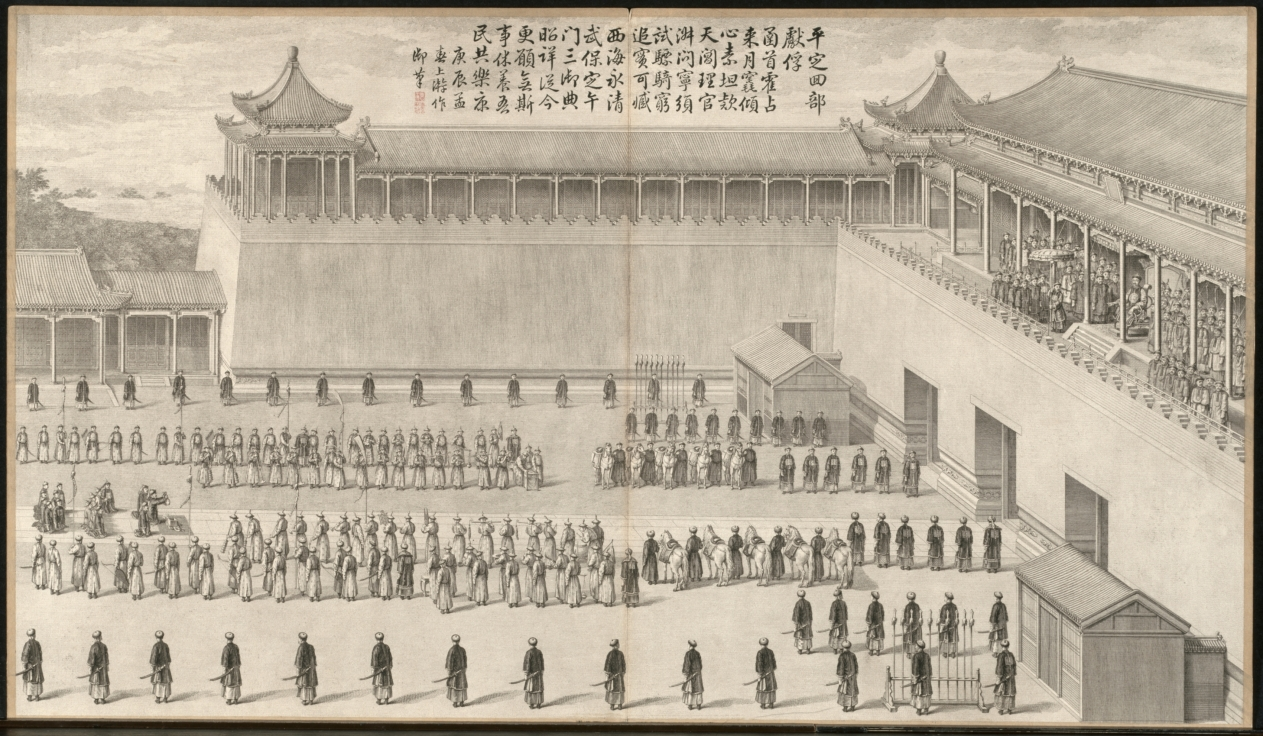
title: The Presentation of Uigur Captives: from Battle Scenes of the Quelling of Rebellions in the Western Regions, with Imperial Poems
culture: China, Qing dynasty (1644–1911), Qianlong reign (1736–95)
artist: Jean Denis Attiret (French, 1702–1768)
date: c. 1765–74; poem dated 1760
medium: etching, mounted in album form, 16 leaves plus two additional leaves of inscriptions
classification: Print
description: This set of etchings was commissioned by Emperor Qianlong to record in pictorial terms the courage of his generals and soldiers in quelling the rebellions in the Western Regions. Qianlong added his own poem to each of the etchings, indicating his appreciation and pride in this demonstration of military might. "Western Regions" refers to the present-day Xingjiang province, often described in Western writing as "Central Asia."